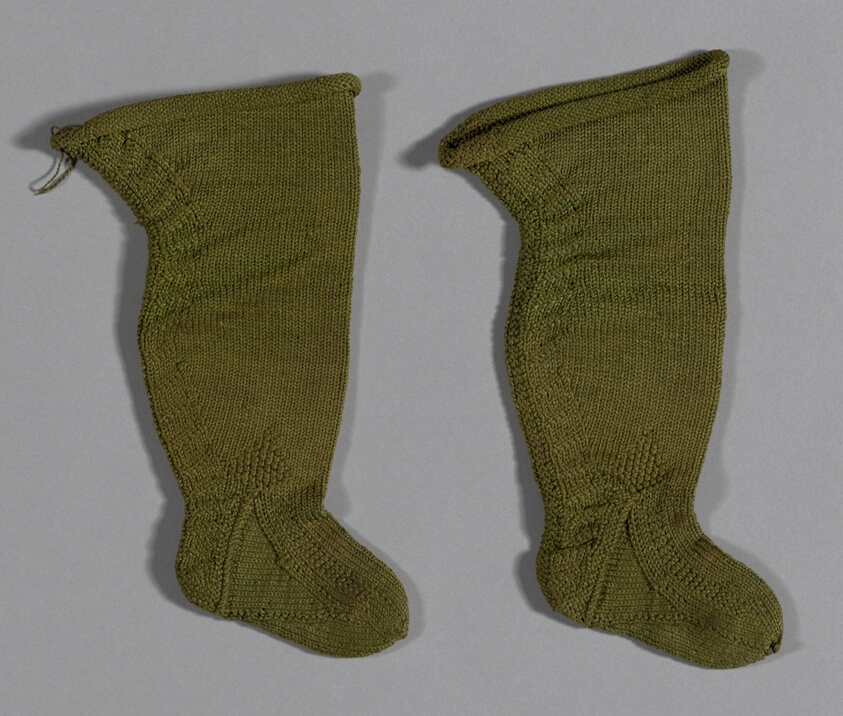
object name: Textile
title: Pair of Baby's Stockings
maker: France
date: 18th century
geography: France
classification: textile; needlework (visual works); costume; dress (garment); clothing